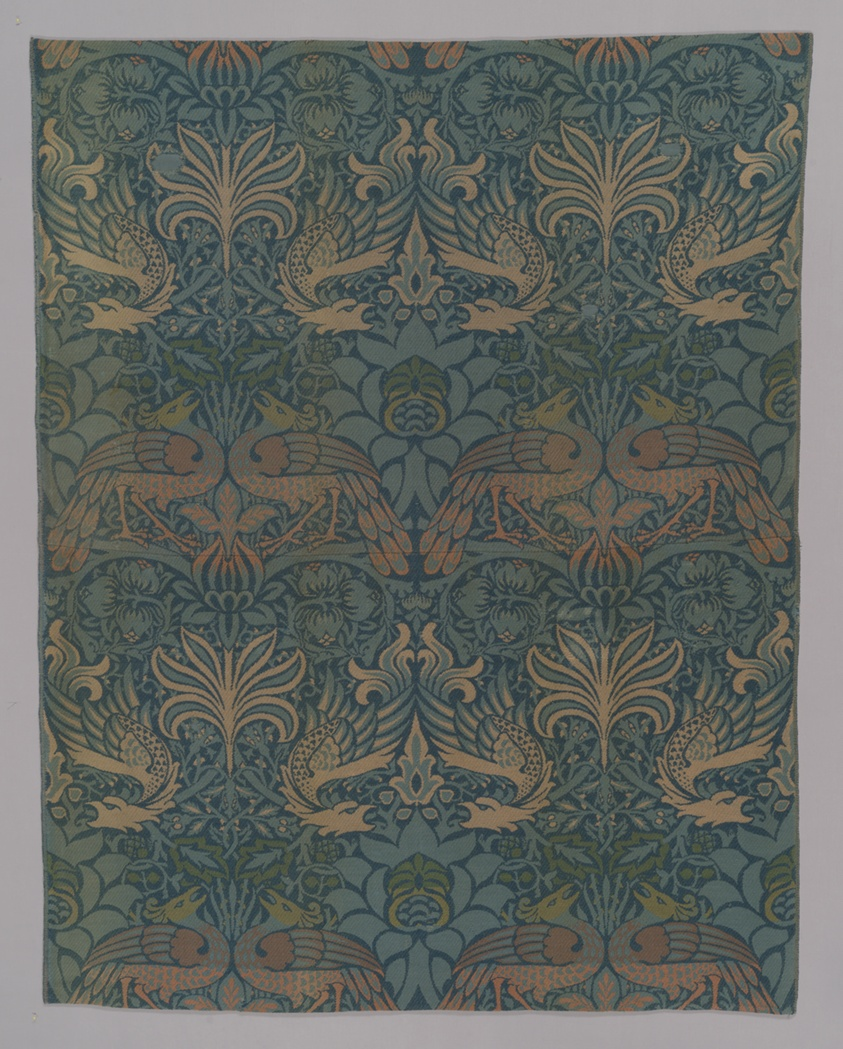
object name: Textile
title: Peacock and Dragon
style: Arts and Crafts Movement, british, 19th century, 20th Century, British Arts and Crafts Movement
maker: Designed by William Morris (English, 1834–1896); Produced by Morris & Co., London (English, 1875–1940); Queens Square, London, or Merton Abbey, London (English, 1881–1940)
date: Design 1878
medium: Wool, three-colored complementary weft, weft-float faced 3:1 twill weave; lined with linen, plain weave; two panels pieced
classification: textile; weaving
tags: peacocks, animals, birds, dragon